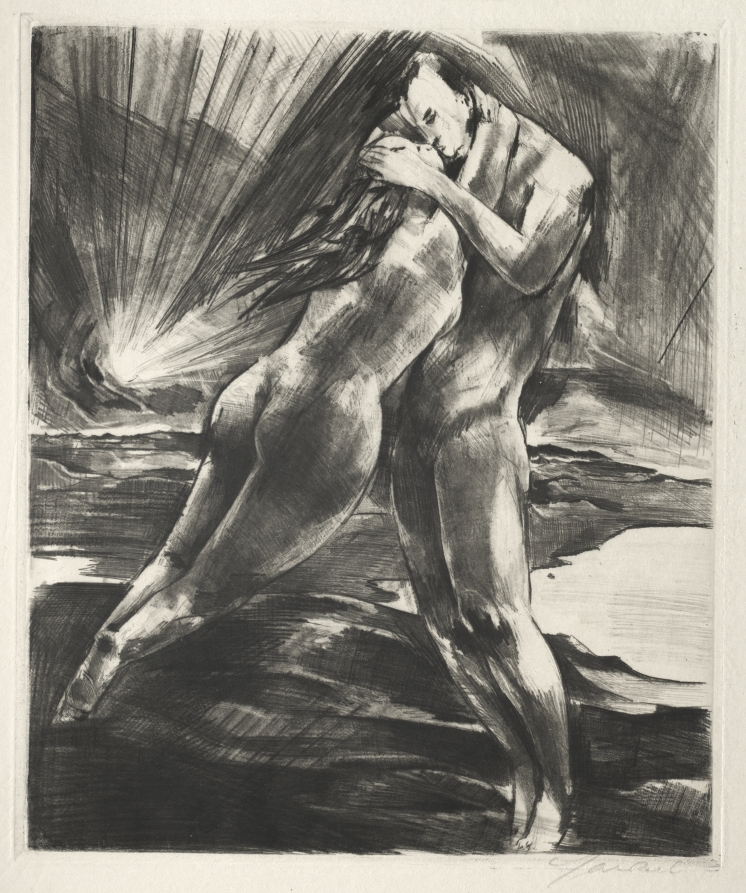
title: Arno Holz Mappe: Schwebendes Paar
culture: Germany, 20th century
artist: Willy Jaeckel (German, 1888–1944)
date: 1923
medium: intaglio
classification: Print